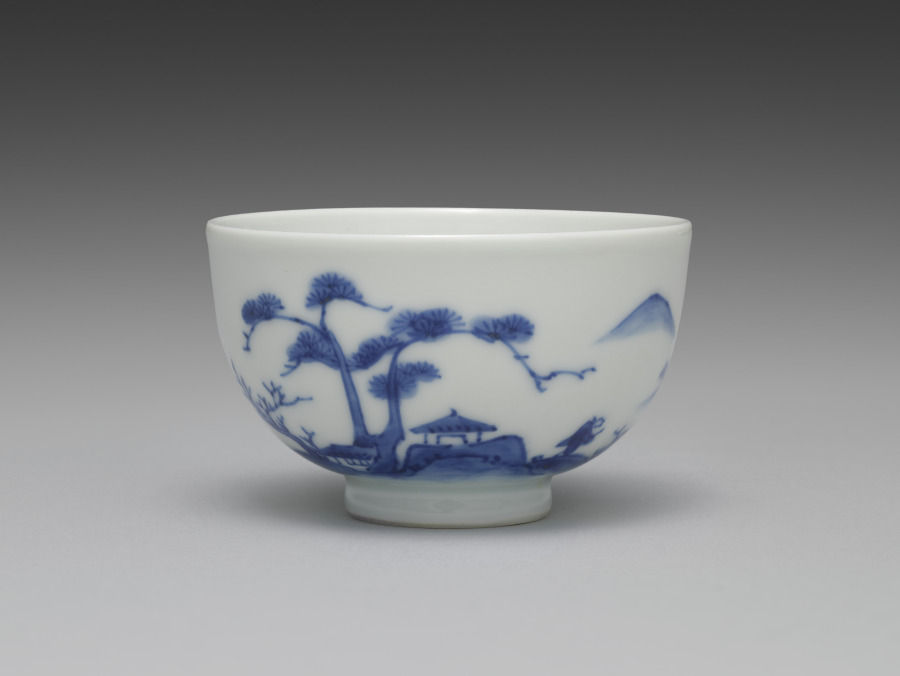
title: Teacup from Tea Set with Chinese Landscape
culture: Japan, Meiji period (1868–1912)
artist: Seifū Yohei III (Japanese, 1851–1914)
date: 1893–1914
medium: Porcelain with underglaze blue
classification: Ceramic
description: The theme of this sencha tea set is the Chinese scholar-recluse in an idyllic landscape. Each of the five teacups has a landscape with an architectural structure and some human activity. This tea set has a side-handled pot called a kyūsu, used for steeping, straining, and serving tea. Unlike some others, this set also has a yuzamashi, a container used to cool boiled water to just the right temperature for the best flavor when steeping. Seifū Yohei III’s painting teacher, Tanomura Chokunyū (1814–1907), made a visual record of famous sencha events that shows how these kinds of porcelains fit with objects such as a stove and kettle to form a complete set of utensils for tea preparation, and with ensembles of decorative objects meant to inspire creativity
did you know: This teacup shows a man with a staff walking away from a residence toward a boat, loaded with what might be a musical instrument wrapped for travel.